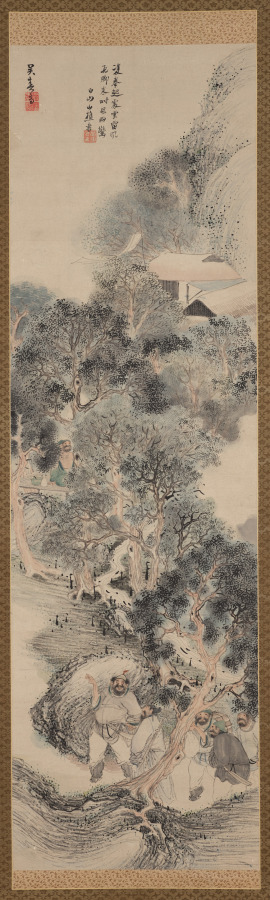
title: Happy Forest, from Water Margin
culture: Japan, Edo period (1615–1868)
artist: Matsumura Goshun (Japanese, 1752–1811)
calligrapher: and Amenomori Shōteki (Japanese, 1731–1786)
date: late 1700s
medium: hanging scroll; ink and color on paper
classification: Painting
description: The Chinese literary classic Water Margin is set in the 1120s and tells the story of 108 outlaws who first rebel against the government and then join forces with it. This painting depicts an episode in which hero Wu Song reclaims the tavern Happy Forest for its rightful owner, the prison warden’s son, Shi En. To prepare for the fight, Wu Song drinks a lot of wine. The painting was inscribed with a quote in which an ally describes Wu Song’s fighting style. It reads as follows: Where his twin fists rise, clouds and thunder roar, When his flying kick comes, wind and rain tremble.